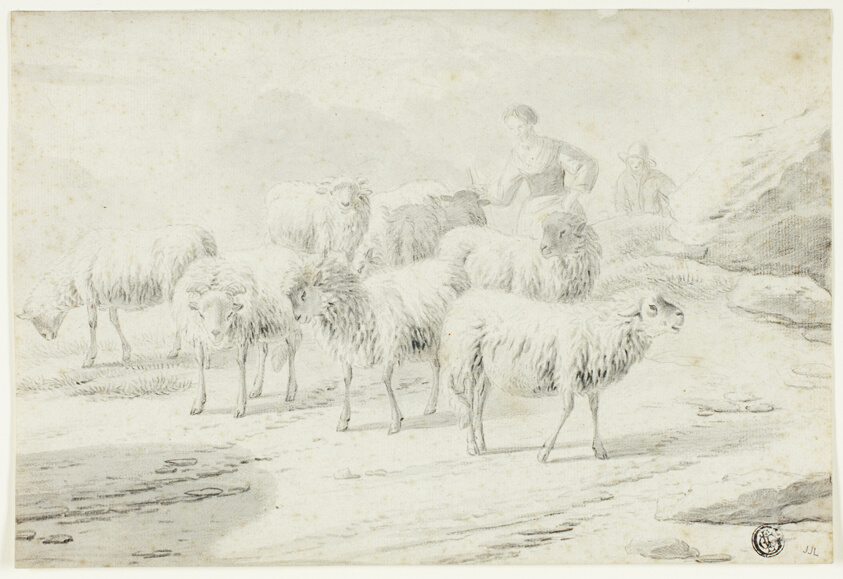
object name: Drawing and Watercolor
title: Shepherdess and Sheep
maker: Philipp Peter Roos (German, c. 1655-1706)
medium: Graphite and black chalk with brush and black and gray wash, on ivory laid paper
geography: Germany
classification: chalk; drawings (visual works); prints and drawing